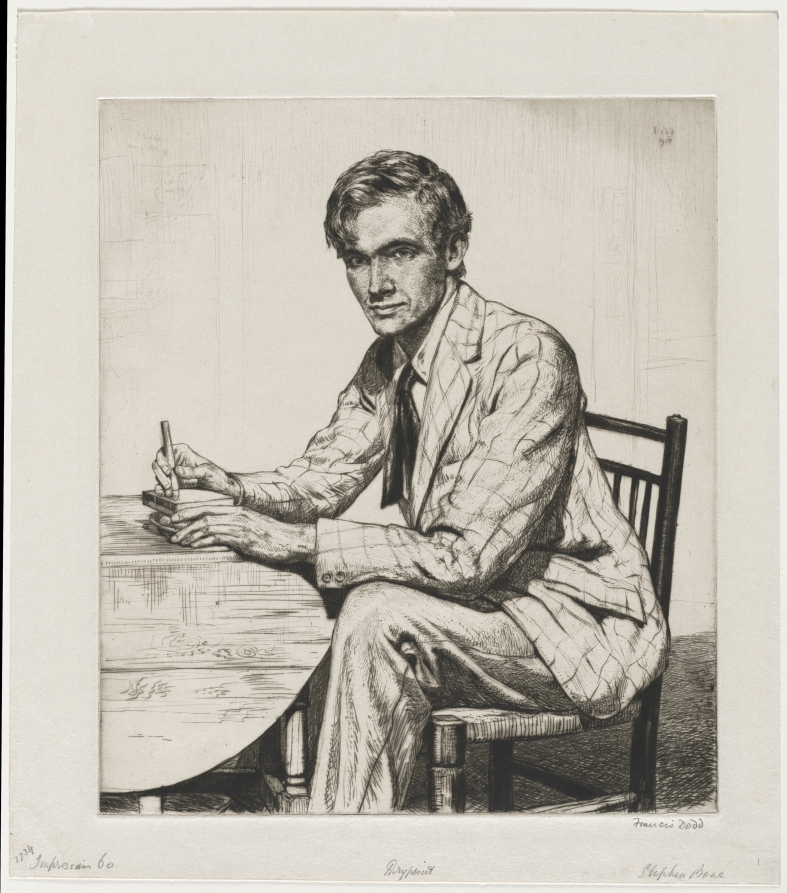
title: Stephen Bone Cutting a Wood Block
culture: England, 20th century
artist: Francis Dodd (British, 1874–1949)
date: 1928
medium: drypoint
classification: Print